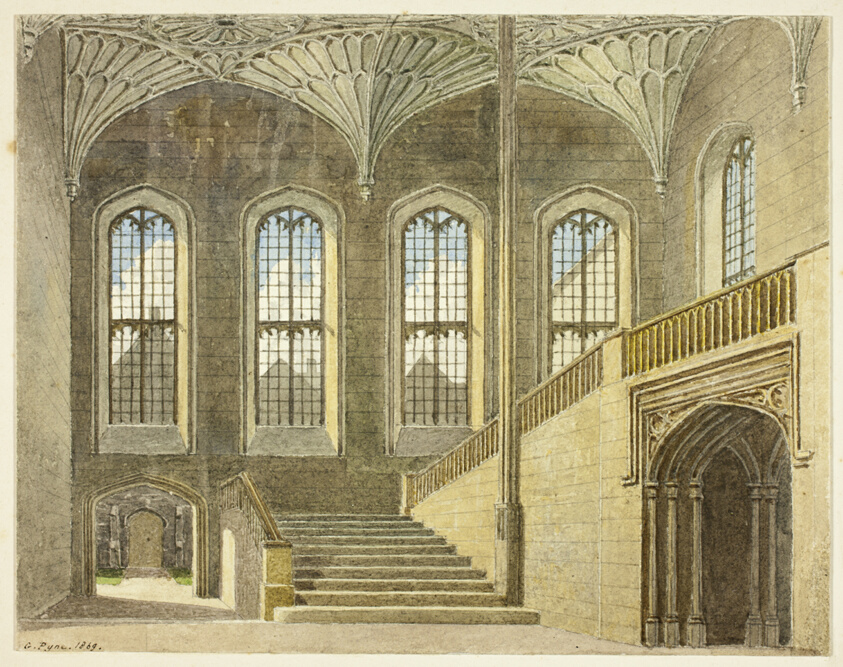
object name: Drawing and Watercolor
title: Entrance Hall, Christchurch, Oxford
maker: George Pyne (British, 1800-1884)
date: 1869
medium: Watercolor, over graphite, on ivory wove card, laid down on card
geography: England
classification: watercolor; drawings (visual works); prints and drawing